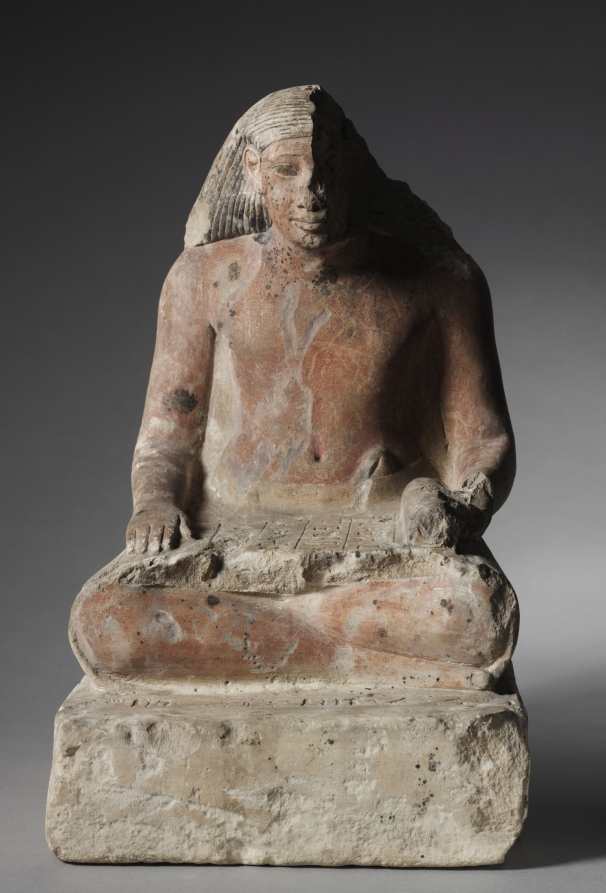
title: Seated Scribe of Medthu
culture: Egypt, New Kingdom (1540–1069 BCE), Dynasty 18, reign of Tuthmosis III (1479–1425 BCE)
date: c. 1479–1425 BCE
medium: limestone, originally painted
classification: Sculpture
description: Medthu, the overseer of the two granaries and scribe of accounts of the fields of Amen, sits cross-legged on the ground in the traditional pose of a scribe. His striated, bell-shaped wig, the stripes of which run parallel to his forehead, completely reveals his ears and passes behind his shoulders. His short, belted kilt is stretched tight to support he papyrus that is partly unrolled across his lap. He holds the rolled-up portion with his left hand, and his right hand rests flat on the papyrus, which curls around his right thigh. The papyrus is inscribed in sunk relief with seven columns of hieroglyphs that face the scribe. The Middle Kingdom type of wig helps date the statue more closely to the earlier part of Dynasty 18, around the time of Tuthmosis III. Later in Dynasty 18 the coiffure was fashionably updated.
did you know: The scribe statue has a long and distinguished history, having first appeared in Dynasty 4 (c. 2613 to 2494 BC).